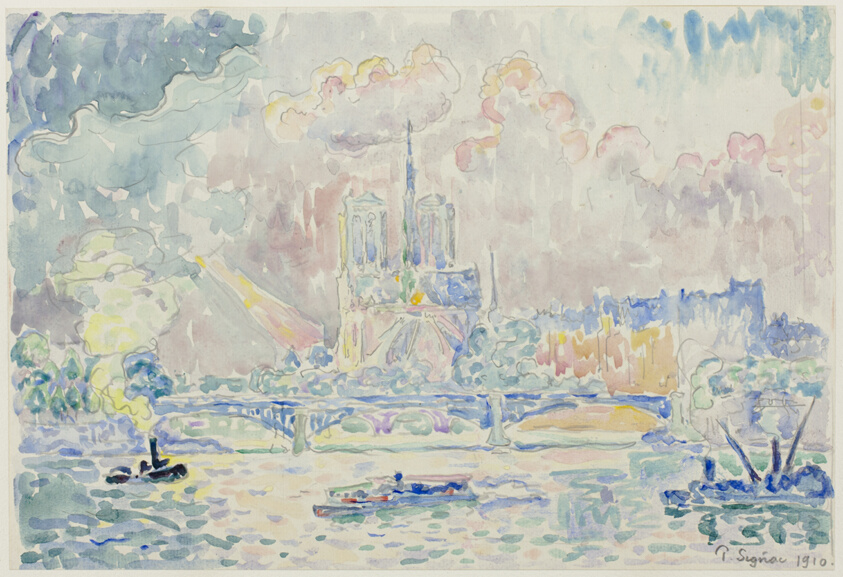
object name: Drawing and Watercolor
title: Notre Dame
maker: Paul Signac (French, 1863-1935)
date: 1910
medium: Watercolor, with graphite, on white laid paper, laid down on white wove paper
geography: France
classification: watercolor; drawings (visual works); prints and drawing